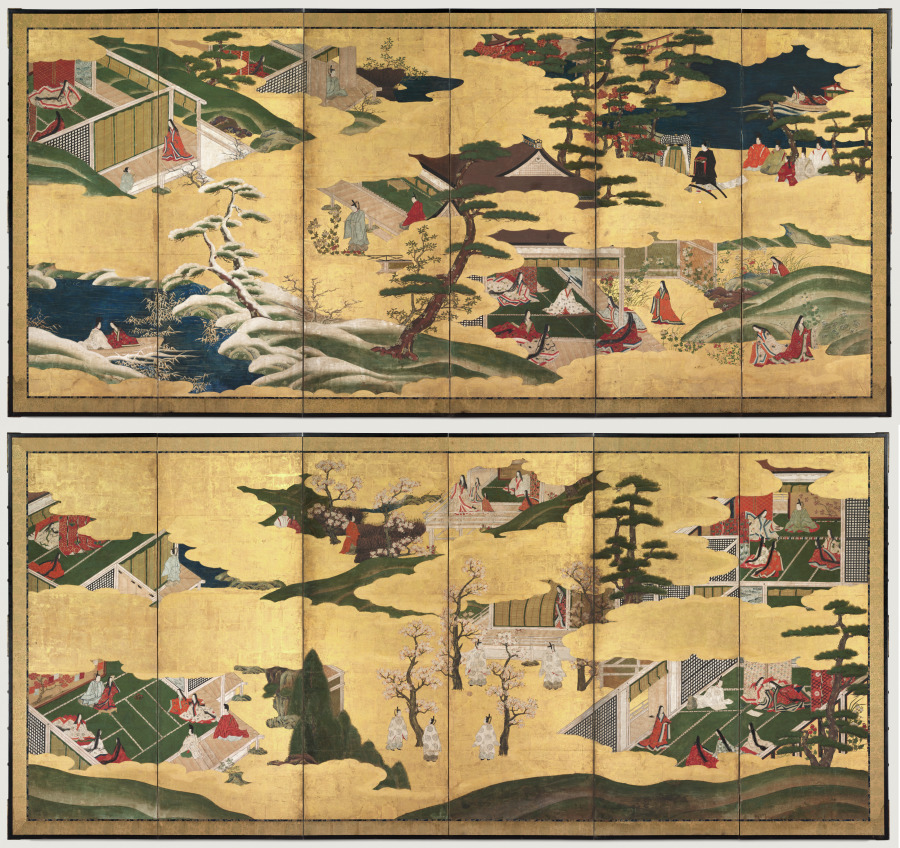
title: Scenes from the Tale of Genji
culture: Japan, Edo period (1615–1868)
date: late 1700s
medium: Pair of six-panel folding screens; ink, color, and gold on gilded paper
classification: Painting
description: Folding screens served as temporary dividers in traditional Japanese open-plan architectural spaces. This pair was inspired by Japan’s most celebrated work of literature, the Tale of Genji, written by Murasaki Shikibu, an attendant to the empress in the early 11th-century imperial court. The novel follows the love life of the “Shining Prince” Genji and delves into the psychological states of his many companions. Distinct episodes are nestled within a matrix of golden clouds and landscape elements. Each screen includes six episodes presented in a nonlinear fashion, capturing scattered highlights of the story.